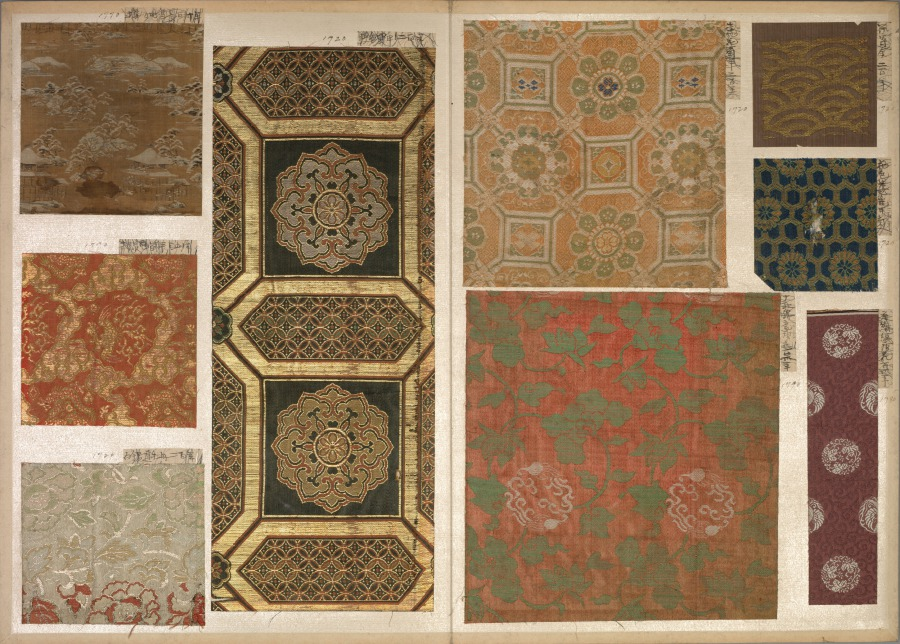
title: Album of Textile Samples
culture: Japan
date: 1790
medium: silk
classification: Textile